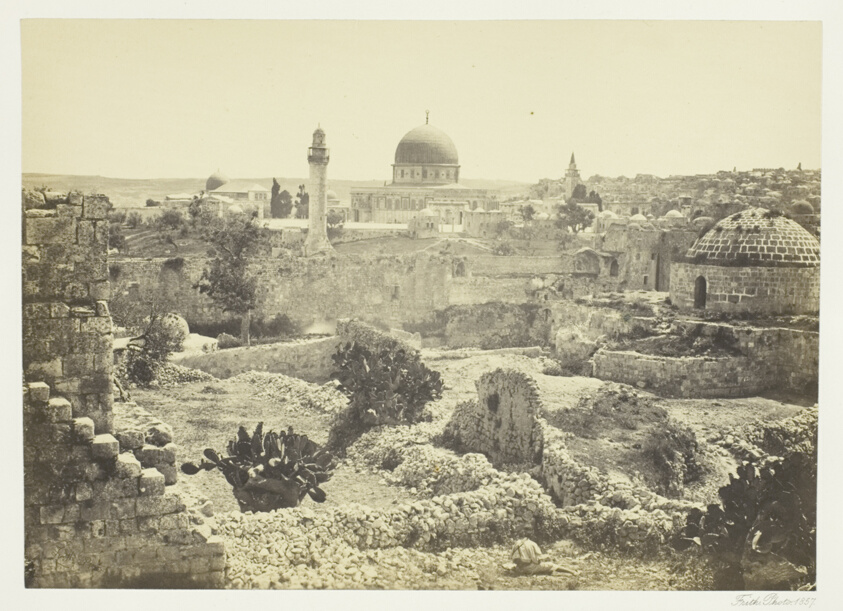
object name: Photograph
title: Jerusalem from the City Wall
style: 19th century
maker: Francis Frith (English, 1822–1898)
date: 1857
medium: Albumen print, pl. 36 from the album "Egypt and Palestine, Volume I" (1858)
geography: England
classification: photograph; albumen silver print; photography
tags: Collected by Hugh Edwards, Egypt and Palestine